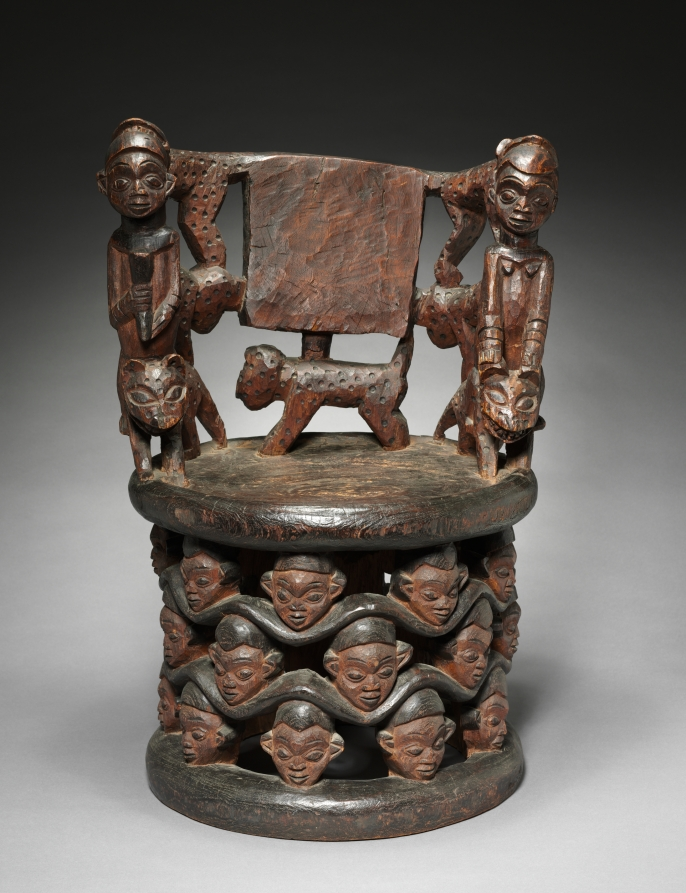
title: Prestige Chair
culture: Africa, Central Africa, Cameroon, Babanki-style maker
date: 1800s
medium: Wood and paint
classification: Furniture and woodwork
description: This stately chair attributed to the Babanki peoples of the Cameroon Grassfields features an unusual configuration of male and female figures. They are mounted on stylized leopards, animals revered as embodiments of power and royalty, which stand atop a base of three undulating rings bearing 24 heads. Chairs like this one serve as visual records that help mark kingships through the ages, conveying power and authority. The chair type was relatively common at the time; they were carved for sale to Europeans and local patrons, and also used as articles of royal gift exchange.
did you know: A British soldier acquired this work in Cameroon during the First World War.